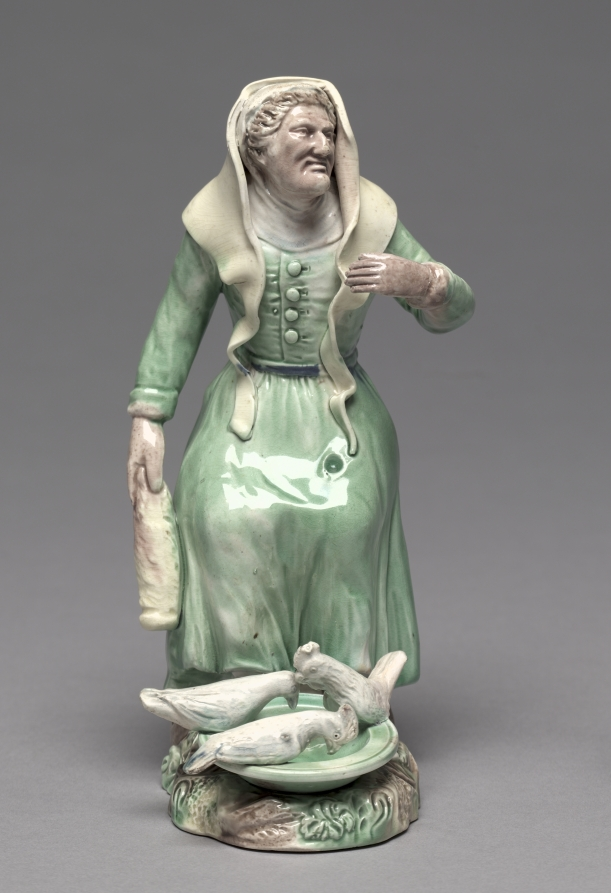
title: Old Woman Feeding Chickens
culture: England, Staffordshire, 18th century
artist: Staffordshire Factory (British)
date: c. 1770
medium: earthenware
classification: Ceramic